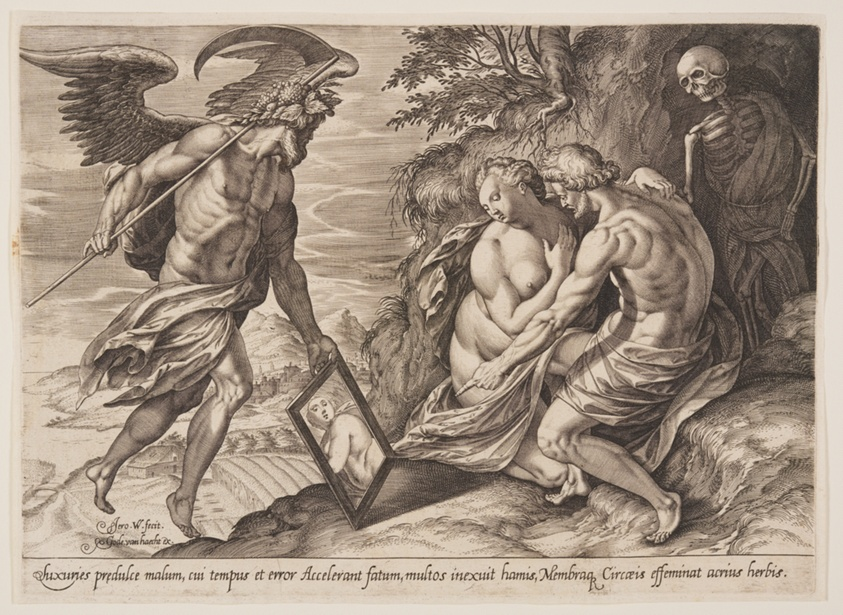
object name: Print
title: Allegory of Love, Time, and Death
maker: Hieronymus Wierix; Flemish, 1553–1619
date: c. 1580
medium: Engraving on ivory laid paper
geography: Flanders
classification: engraving; paper; print; prints and drawing